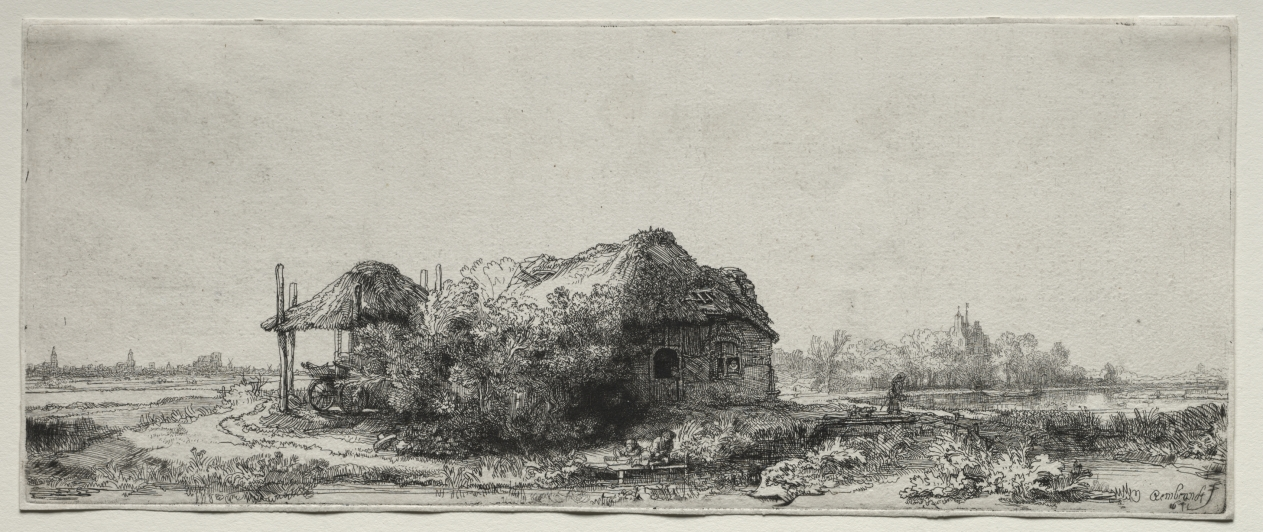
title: Landscape with a Cottage and Hay Barn: Oblong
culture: Netherlands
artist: Rembrandt van Rijn (Dutch, 1606–1669)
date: 1641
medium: etching and drypoint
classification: Print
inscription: lower right, in plate: Rembrandt f / 1641 ; VERSO, lower left, in graphite: W4682